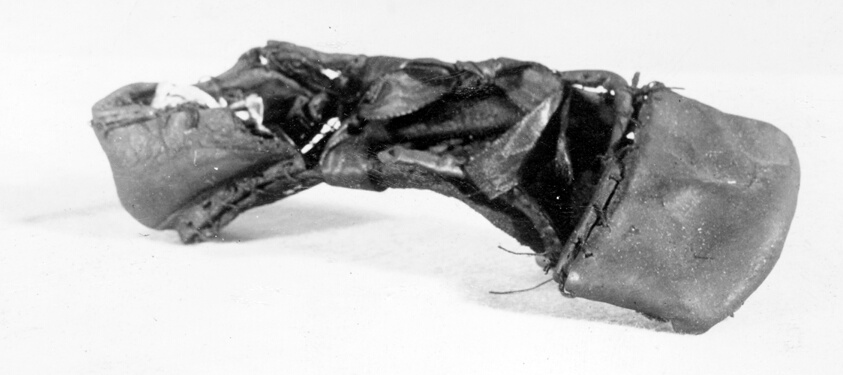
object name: Costume and Accessories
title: Child's Shoe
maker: England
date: 16th century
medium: Leather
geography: England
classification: textile; costume accessory - shoe; shoes - misc; costume; dress (garment); clothing